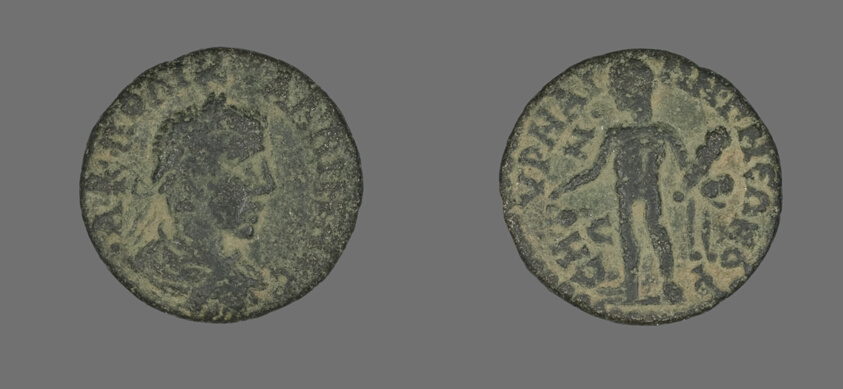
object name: Coin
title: Coin Portraying the Emperor Gallienus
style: roman (ancient, style or period)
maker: Roman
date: 253-268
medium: Bronze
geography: Roman Empire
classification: coin; ancient art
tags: portrait